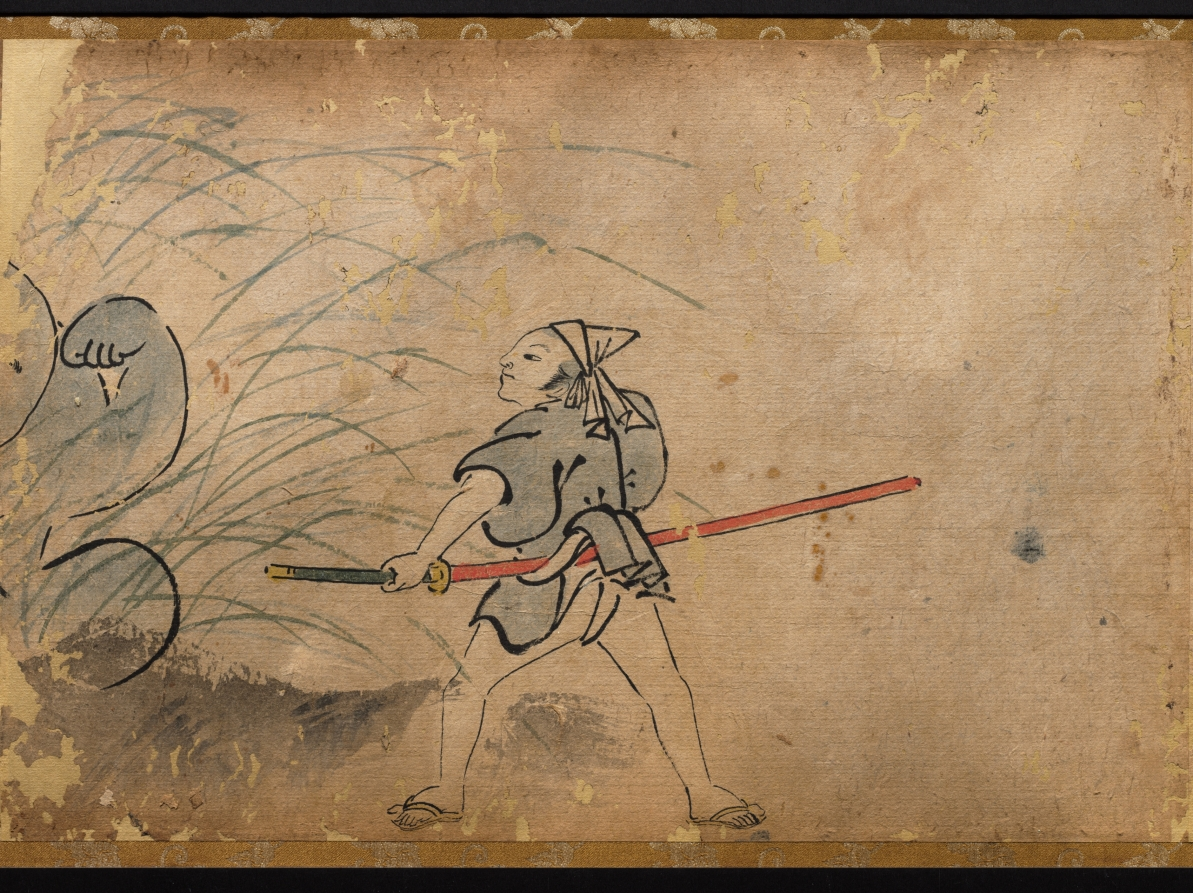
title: The Illustrated Tale of Oishi Hyōroku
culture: Japan, Edo period (1615–1868)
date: 1700s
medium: handscroll; ink and color on paper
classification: Painting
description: This incomplete handscroll illustrates part of the story of Oishi Hyoroku, a young man tasked with battling fox apparitions who were creating problems in his town. In other extant versions of the scroll, the story is set in the fall of 1624 in Kagoshima in southern Japan. Throughout the story, Hyoroku is tricked and terrified by the foxes that shift their shapes into a variety of monstrous phantoms. After repeated humiliations, he eventually captures two of the foxes. In this version, colloquial texts that function like text blurbs in comics appear throughout the scroll, but the main text is missing.